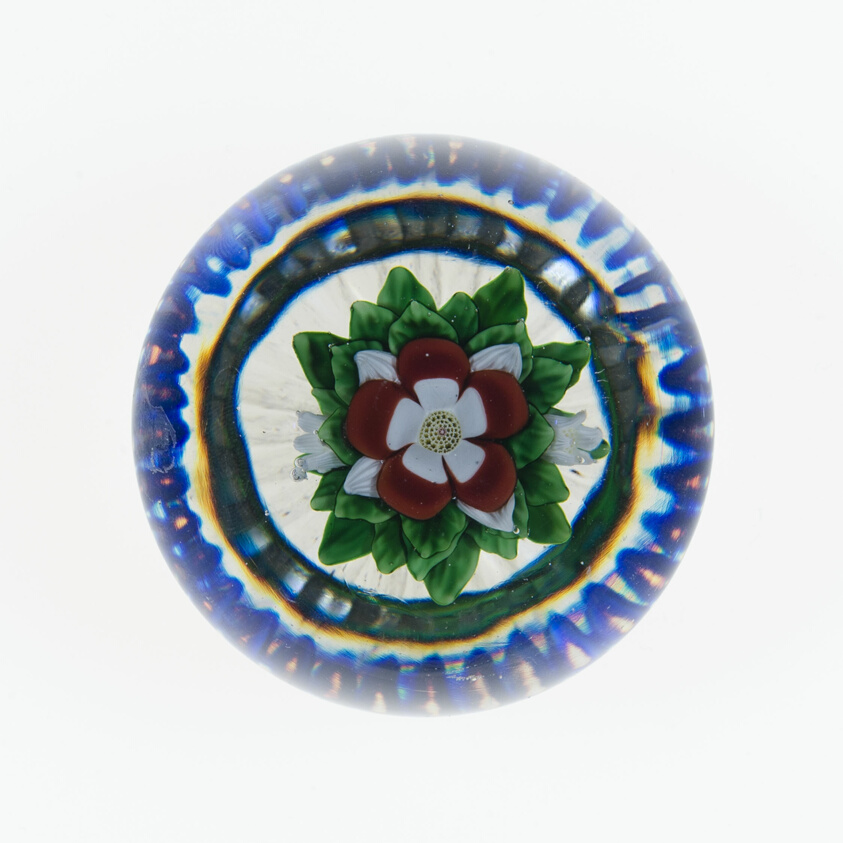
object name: Glass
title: Paperweight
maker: Baccarat Glassworks (Cristalleries de Baccarat); Lorraine, France, founded 1764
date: c. 1848–55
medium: Glass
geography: Lunéville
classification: paperweight; lampwork; european decorative arts; glass